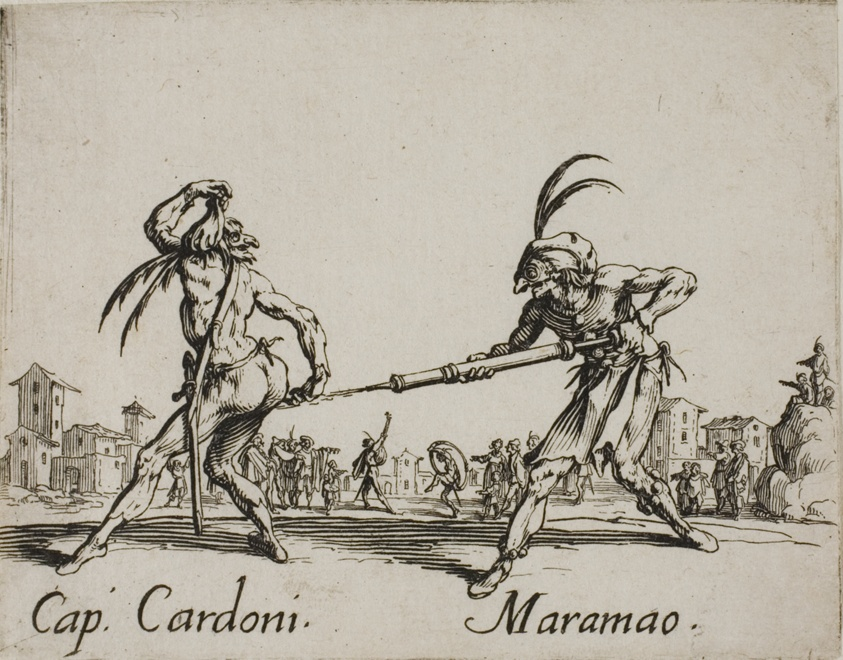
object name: Print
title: Capitano Cardoni - Maramao, plate 22 from Balli di Sfessania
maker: Jacques Callot (French, 1592-1635)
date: c. 1622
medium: Etching and engraving on paper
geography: France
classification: etching; print; prints and drawing